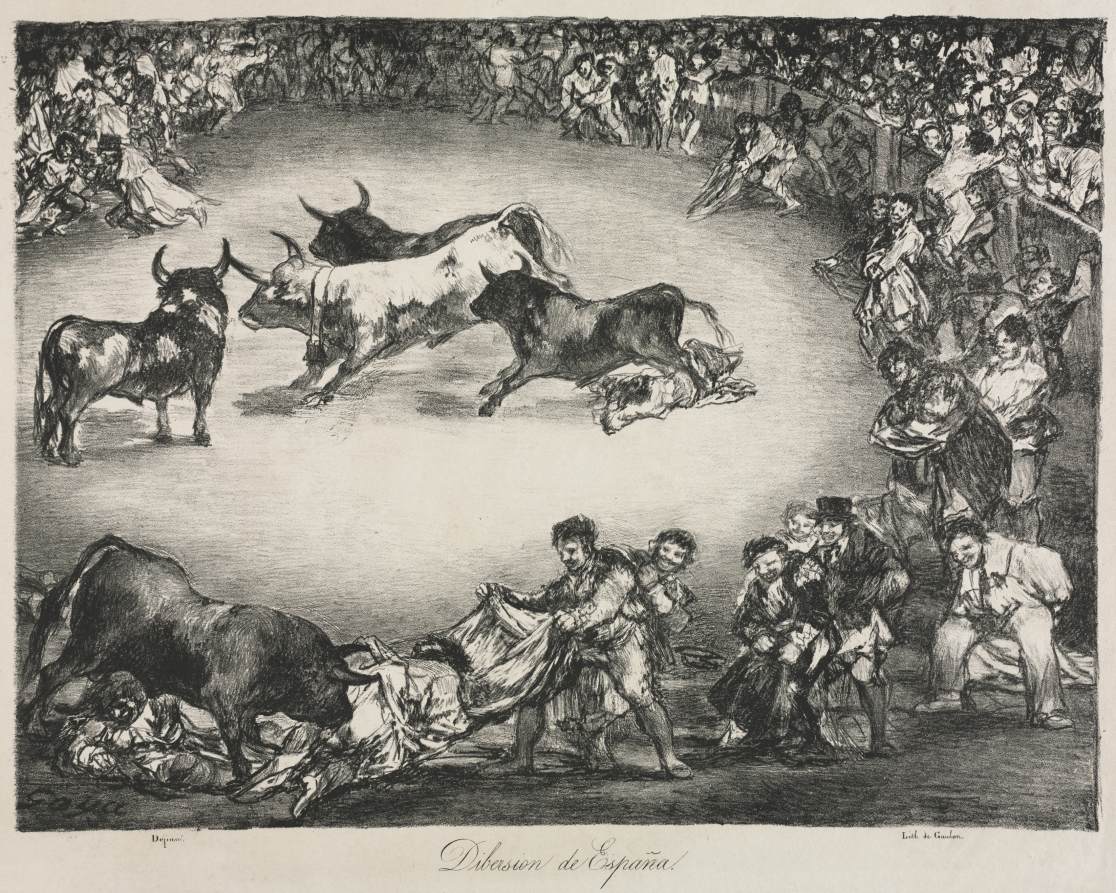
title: The Bulls of Bordeaux: Spanish Entertainment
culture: Spain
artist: Francisco de Goya (Spanish, 1746–1828)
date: 1825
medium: lithograph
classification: Print